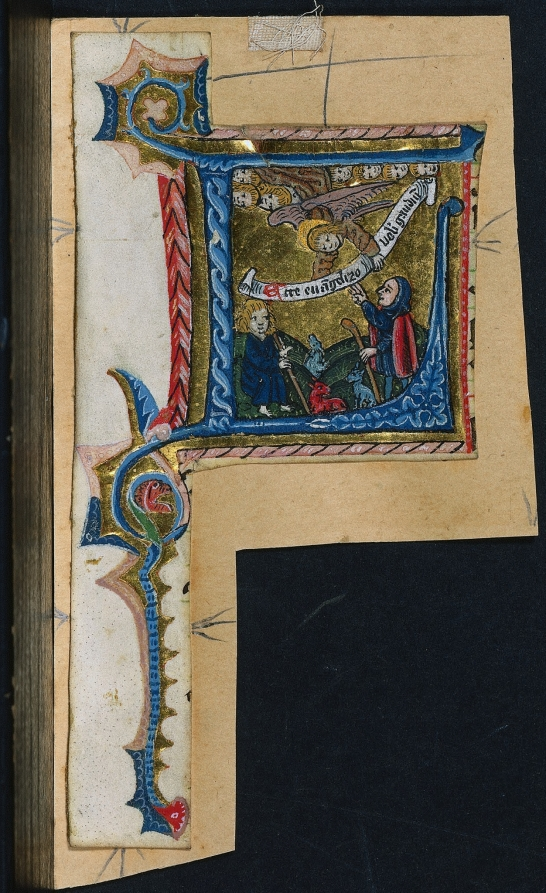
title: Three Cuttings from a Missal: Initial L with the Annunciation to the Shepherds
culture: Germany, Franconia or Saxony (?) or Silesia (?), 15th century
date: c. 1470–1500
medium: ink, tempera and gold on vellum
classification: Manuscript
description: These three cuttings are illuminated in a style that is somewhat provincial and difficult to localize. The figures relate to late 15th-century German woodcut illustration, but also vaguely recall Franconian sculpture and Saxon painting. The figures are simply, though charmingly, sketched in heavy black ink with little attention to finesse of line or detail. The palette is confined to dark hues of red, blue, and ochre with flesh tones either left white or colored pink. The style hints at an origin in Franconia, Saxony, or Silesia. The initial E includes a form of musical notation called Hufnagalshrift or "horseshoe nail writing" because it resembles the nails used to attached horseshoes. Hufnagalshrift appears almost exclusively in manuscripts produced in Germanic Central Europe. The use of different colored lines in the musical stave is a known feature of Saxony. The text Exultet iam angelica (Rejoice now angel) begins the prayer used only on Holy Saturday during the Easter Vigil. It was sung by the priest at Mass to a very special and ancient melody.